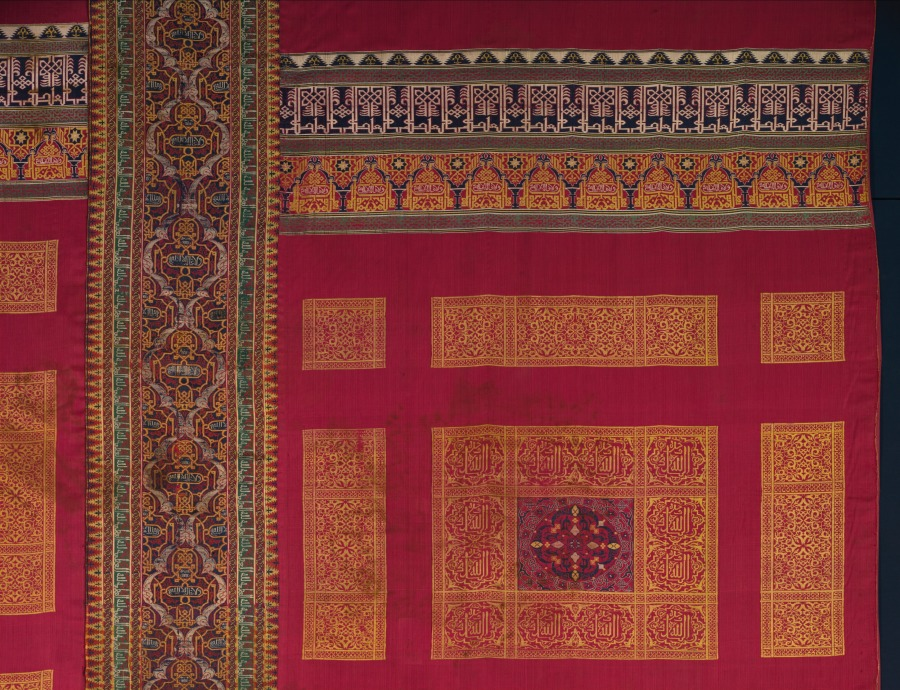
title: Silk curtain from the Alhambra palace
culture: Spain, Granada, Nasrid period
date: 1300s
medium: lampas and taqueté: silk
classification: Textile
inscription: the bold knotted Kufic inscription in the top and bottom borders of the side panels repeats the Arabic word "felicity." Within the arches forming a frieze in the top border is a Kufic inscription "good fortune" and a Naskhi inscription repeating trhe motto of the Nasrid dynasty, "There is no conqueror but God." In the borders of the three large ornamental rectangles on each side panel is the Naskhi inscription "Dominion belongs to God alone." On the central panel the inscriptions in the borders repeat the phrase, "Majestry is God's," while the Nasrid motto, "There is no conqueror but God" and, above, "Blessing," are inscribed in the arabesque ogives.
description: This is one of two of the largest, most complete, and most ornate curtains to survive from the 1300s when it presumably hung in the royal Alhambra Palace in Granada, the last Muslim stronghold in Spain. Its style, artistic vocabulary, and harmonious proportions reflect the magnificent wall decoration in the Alhambra. The motto of the ruling Nasrid dynasty, "There is no conqueror but God," is inscribed in the end borders and central panel. The inscribed striped silk forming the central panel is more worn, suggesting that it was recycled, most likely during the 1300s.